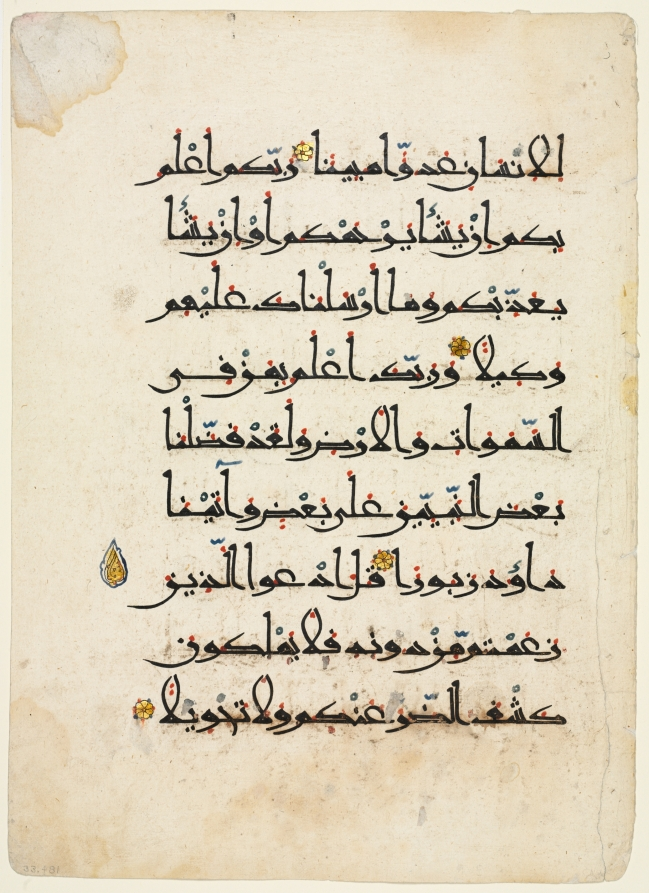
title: Leaf from a Qur'an (recto)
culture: Egypt ?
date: 1000s-1100s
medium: ink, gold, and colors on paper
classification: Drawing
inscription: Sura al-Isra' [Chapter: The Israelites] (17: part 53–56) (Arabic). Script: Eastern Kufi (nine lines to a page)